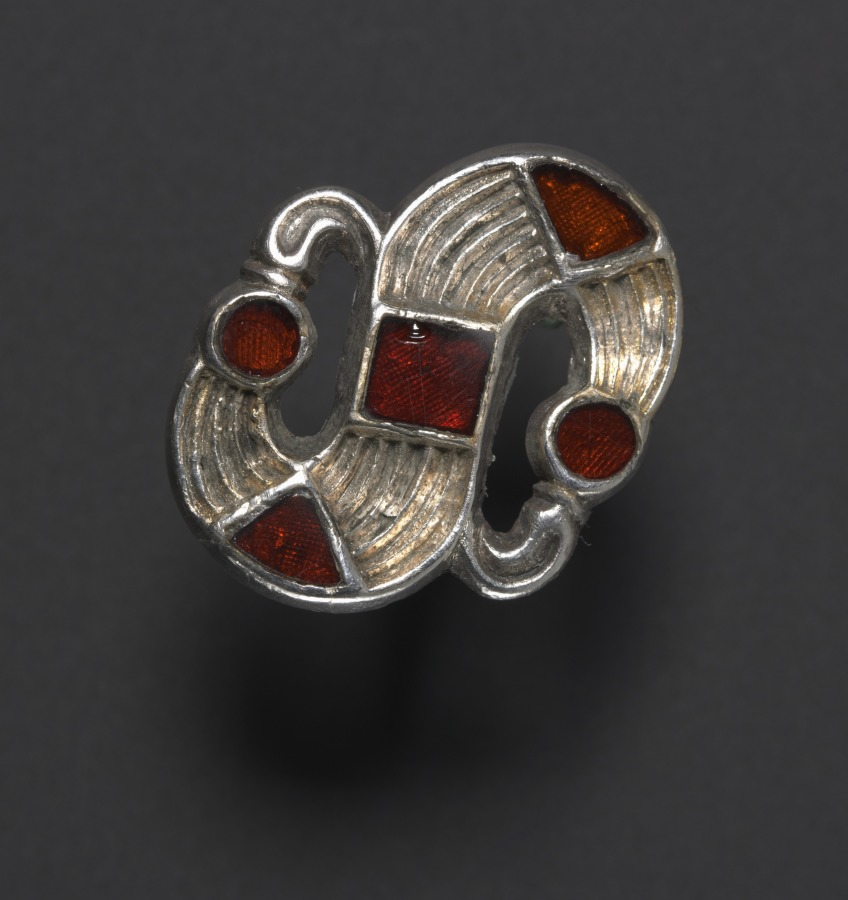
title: S-Shaped Fibula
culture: Frankish, 6th century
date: 500s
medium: silver with garnets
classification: Jewelry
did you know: Garnets, the red stones in this brooch, are found in small waterways like streams.